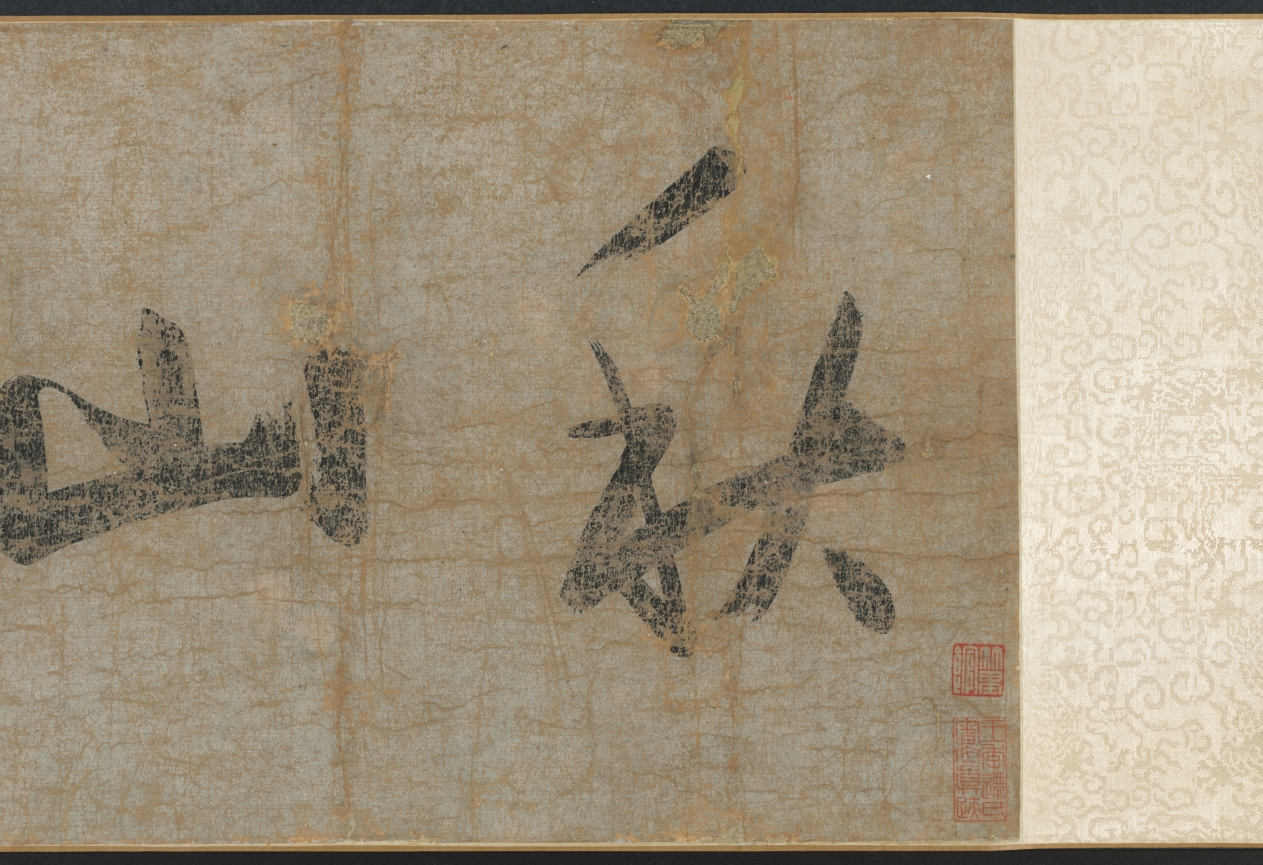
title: Scholar-Hermits in the Autumn Mountains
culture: China, Ming dynasty (1368–1644)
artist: Tang Yin (Chinese, 1470–1523)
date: 1500–1510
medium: handscroll, ink and light color on silk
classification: Painting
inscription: Artist's signature and 2 seals at end of scroll: Tang Yin [seals] T'ang Po-hu; T'ang Tzu'wei t'u-shu.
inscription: Title on frontispiece by Li Cho-kung (dates unknown).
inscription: 1 colophon and 11 additional seals: 1 colophon dated 1915 of Wu Tso-hsi (19th-20th c.); 2 seals of Gao Qifeng 高奇峰 (1889–1933); 5 seals of C. C. Wang 王季遷 (1907–2003); 4 seals unidentified.